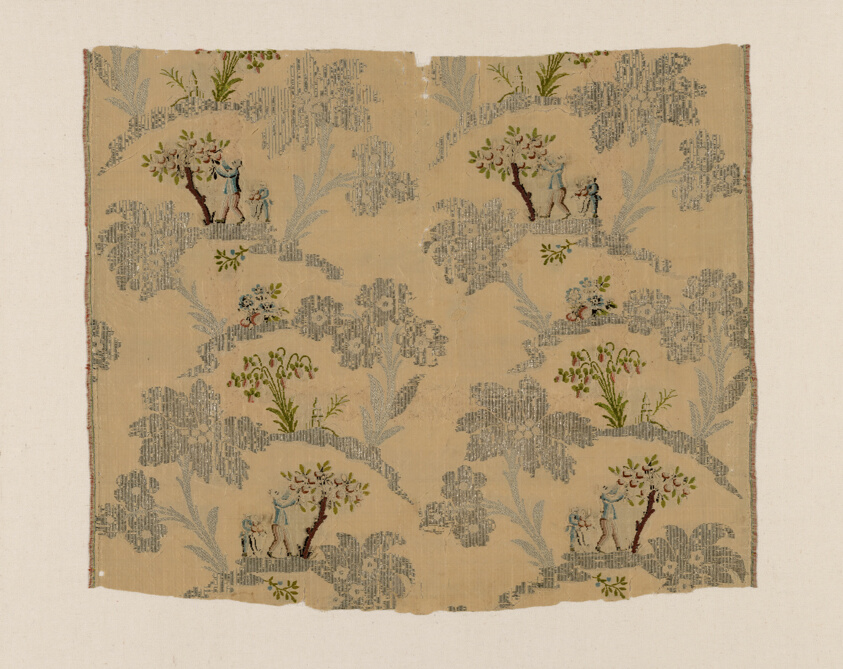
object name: Textile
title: Fragment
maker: France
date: c. 1750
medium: Silk, silvered-metal strips, and silvered-metal-strip-wrapped silk, weft-rib plain weave with supplementary brocading wefts and patterning wefts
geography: France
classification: textile; weaving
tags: trees, fruit, flowers